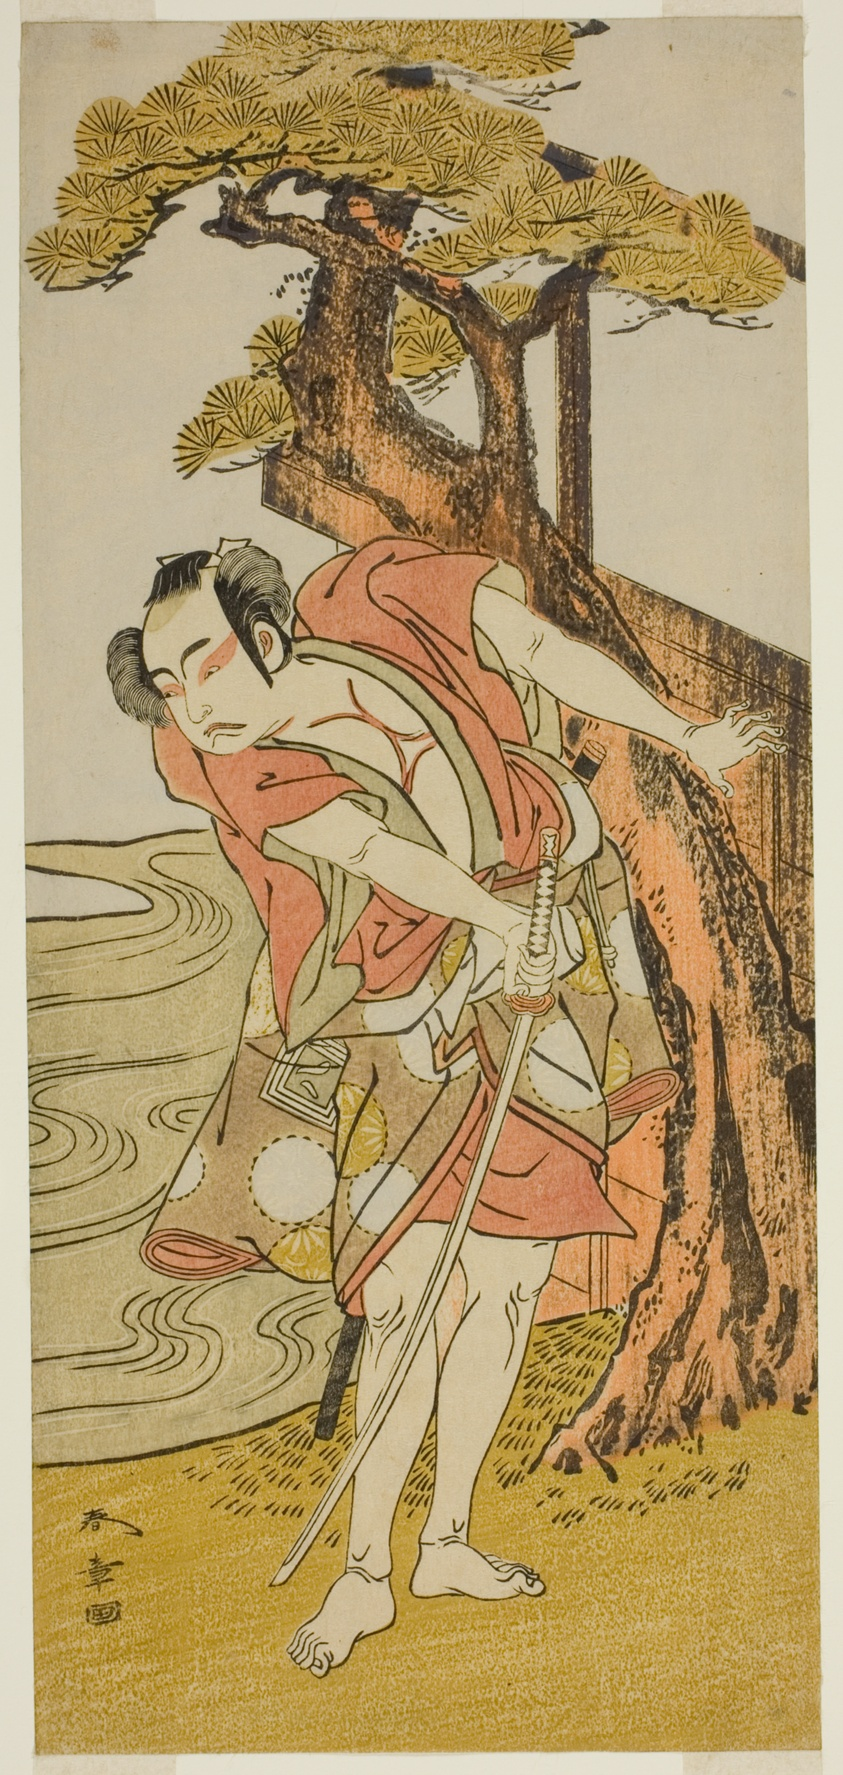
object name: Print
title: The Actor Ichikawa Yaozo II as Iba no Juzo (?)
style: Japanese (culture or style)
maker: Katsukawa Shunsho 勝川 春章; Japanese, 1726-1792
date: c. 1772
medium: Color woodblock print; hosoban; right sheet of diptych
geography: Japan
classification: woodblock print; print; asian art